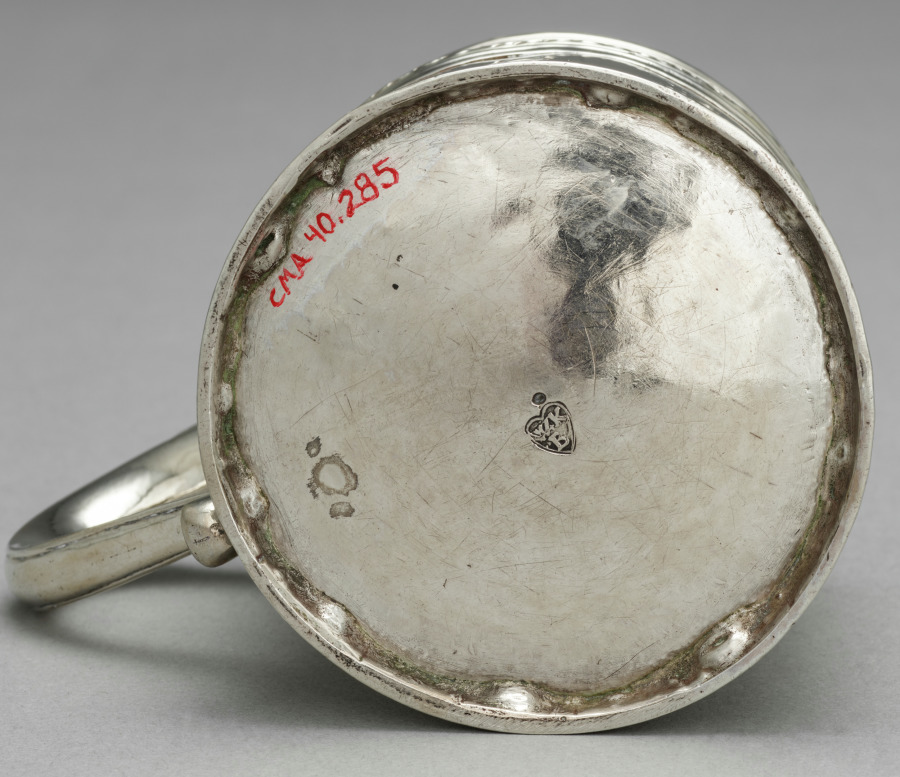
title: Cup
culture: America, New York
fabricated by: Benjamin Wynkoop (American, 1675–1728)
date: 1700–1725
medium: silver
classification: Silver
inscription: engraved: "W" over "C*G" in block letters on front of cup, opposite handle.